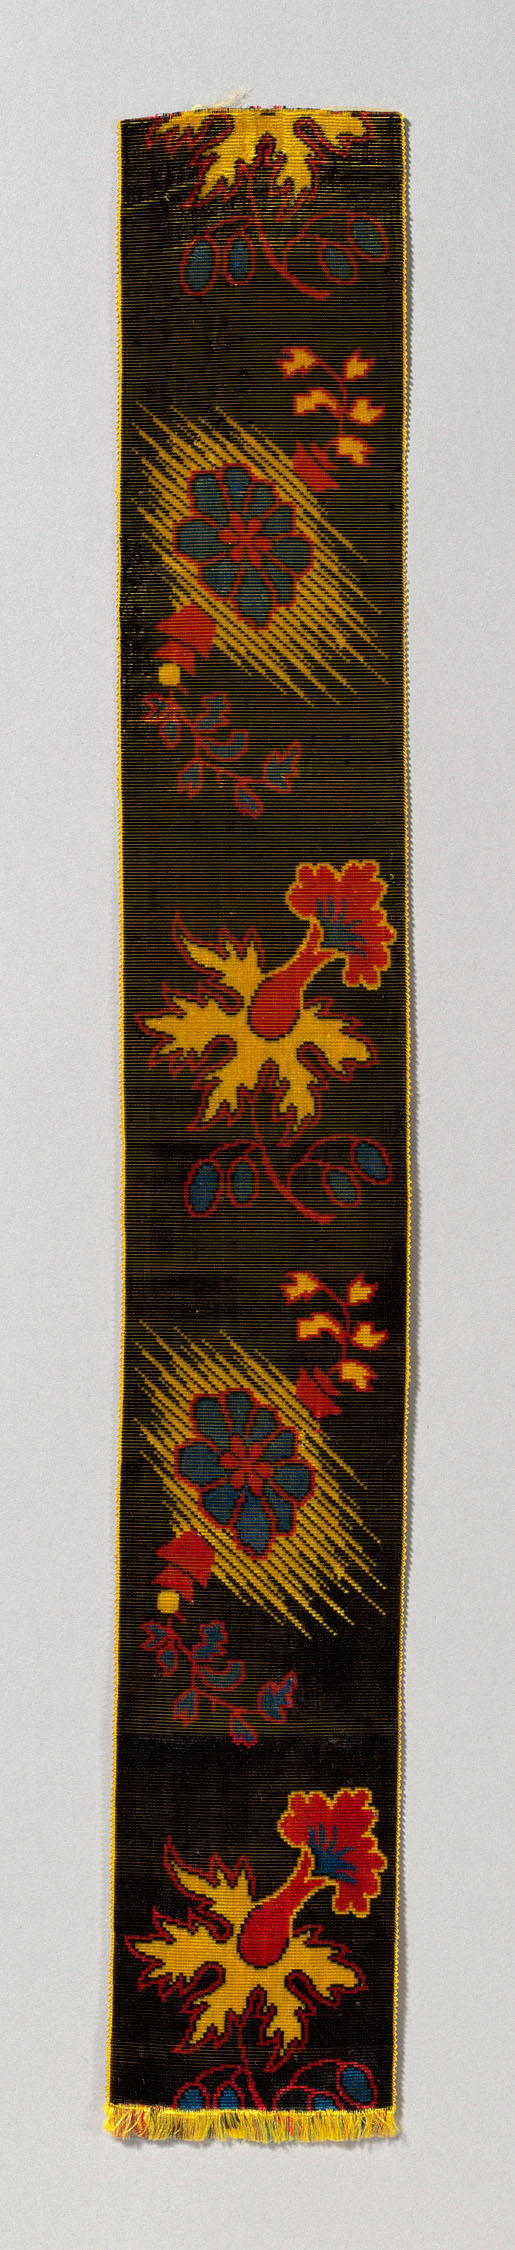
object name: Textile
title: Ribbon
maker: France, Provence-Alpes-Côte-d'Azur Région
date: 19th century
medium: Silk, plain weave with supplementary four-color pile warps forming cut solid velvet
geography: France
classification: textile; weaving - velvet